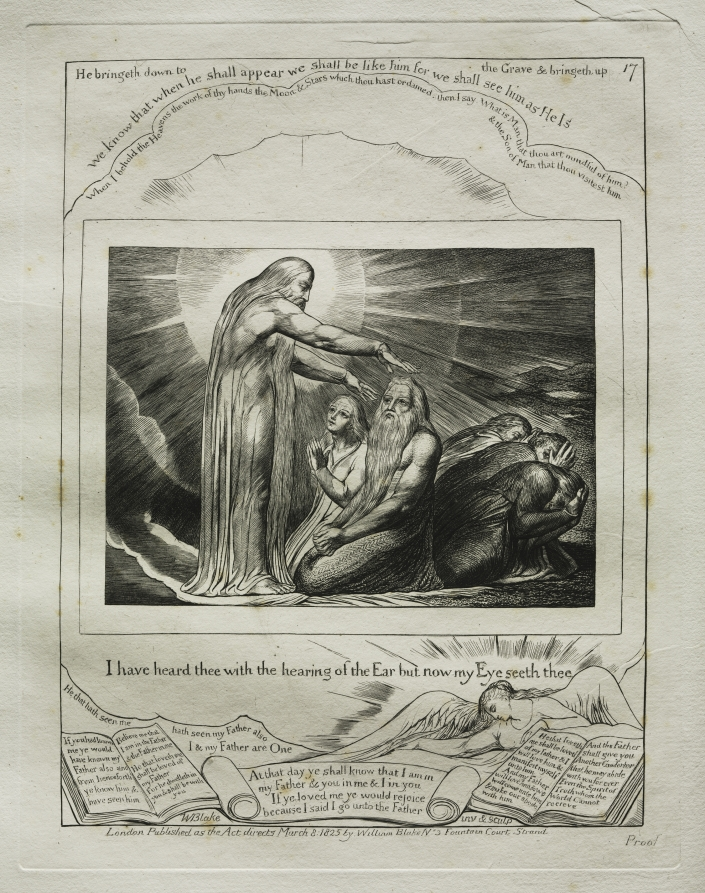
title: The Book of Job: Pl. 17, I have heard thee with the hearing of the Ear but now my Eye seeth thee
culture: England, 18th century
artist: William Blake (British, 1757–1827)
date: 1825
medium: engraving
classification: Portfolio